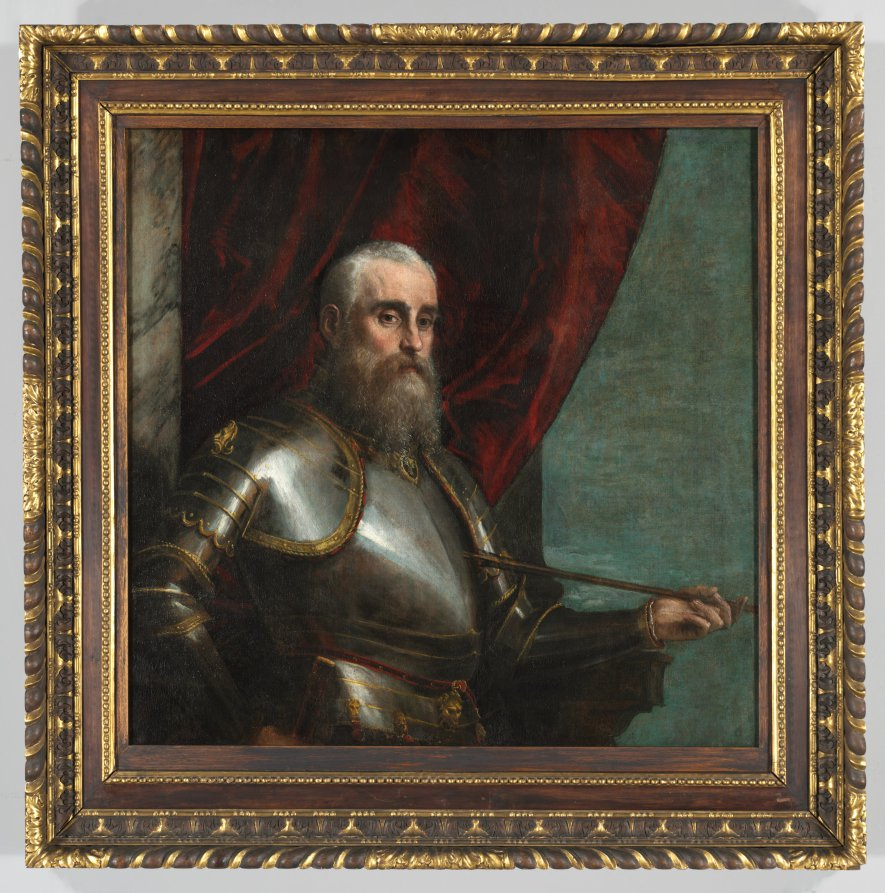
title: Portrait of Agostino Barbarigo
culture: Italy, Venice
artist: Paolo Veronese (Italian, 1528–1588)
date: after c. 1571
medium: oil on canvas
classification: Painting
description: Barbarigo served as second in command of the Venetian naval forces during the Battle of Lepanto, fighting against the Ottoman Empire on October 7, 1571. During the skirmish, Barbarigo was slain by a Turkish arrow, which he holds in the portrait. Barbarigo’s identity is defined by his military prowess. In the 1500s, Venetian military portraits often portrayed the sitter in armor in a pose typical of a Roman emperor, creating a link to the valor and might of ancient armies.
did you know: The arrow symbolically indicates that this portrait was painted after the sitter died in battle.